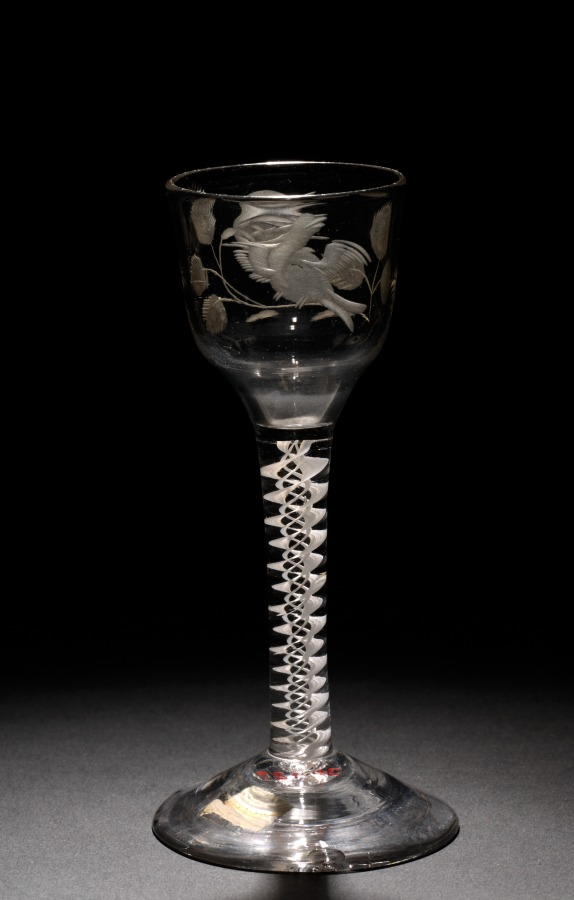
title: Wine Glass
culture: England, 18th century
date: 1750–1799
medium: glass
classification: Glass